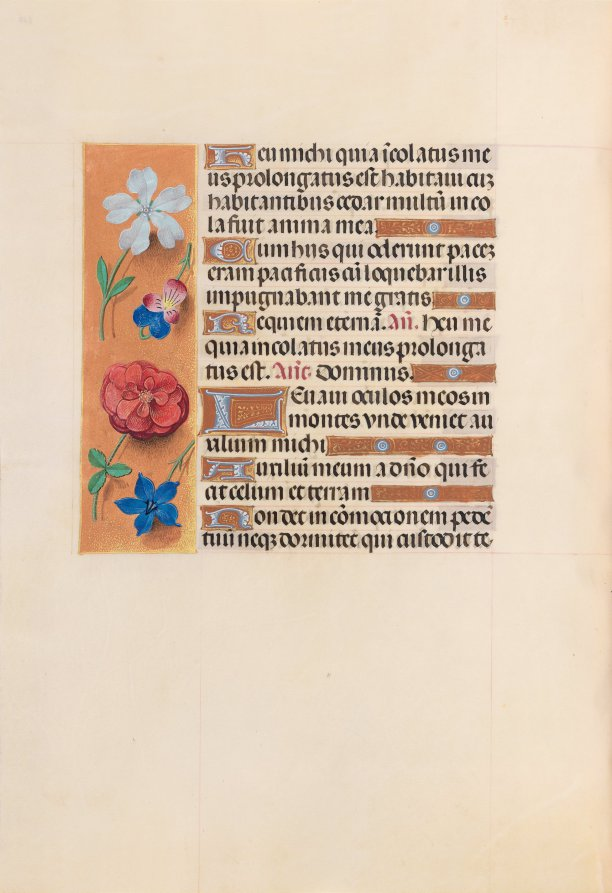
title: Hours of Queen Isabella the Catholic, Queen of Spain: Fol. 221v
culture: Flanders, Ghent and Bruges, late 15th century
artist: Master of the First Prayerbook of Maximillian (Flemish, c. 1444–1519)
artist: and Associates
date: c. 1500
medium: ink, tempera, and gold on vellum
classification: Bound Volume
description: This manuscript was illuminated by a circle of at least five highly organized manuscript painters active in the Flemish cities of Ghent and Bruges. The principal illuminator was Alexander Bening, who painted the majority of the book's miniatures. Manuscripts produced by this circle of artists are renowned for the decoration of their borders, which typically feature a rich variety of realistically-painted flowers, birds, and butterflies. This prayer book, called a book of hours, was intended not for a cleric, but for the private devotions of a lay person-in this case, Isabella the Catholic, Queen of Spain (1451-1504). Isabella's coat of arms embellishes the book's frontispiece. It is unlikely that the book was commissioned by the Queen herself; rather, she probably received it as a diplomatic gift from someone courting her patronage, perhaps Cardinal Francisco Jimenez de Cisneros. A Franciscan friar, Jimenez was dependent upon Isabella for his advancement, first to the post of Queen's confessor in 1492, and then to Archbishop of Toledo in 1495.